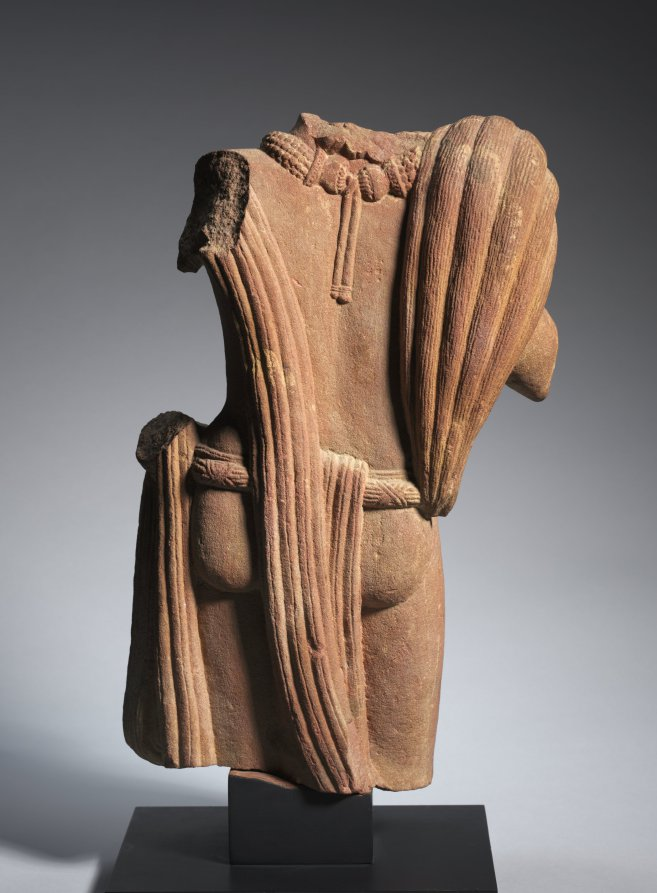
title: Attendant Bearing a Fly Whisk (Chauri)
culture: Northern India, Uttar Pradesh, Mathura, Kushan period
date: c. 100–150 CE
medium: red sandstone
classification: Sculpture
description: This figure would have been one of two flanking a king, the Buddha, or other royal or holy figure. The relaxed stance indicates that he is an attendant, rather than a central icon. Early depictions of the Buddha in India frequently have images of chauri-bearers on either side. They are identifiable as nature divinities called yakshas during this period, but in later periods the Buddha's attendants can be recognized as specific bodhisattvas, who are beings on the path to enlightenment.